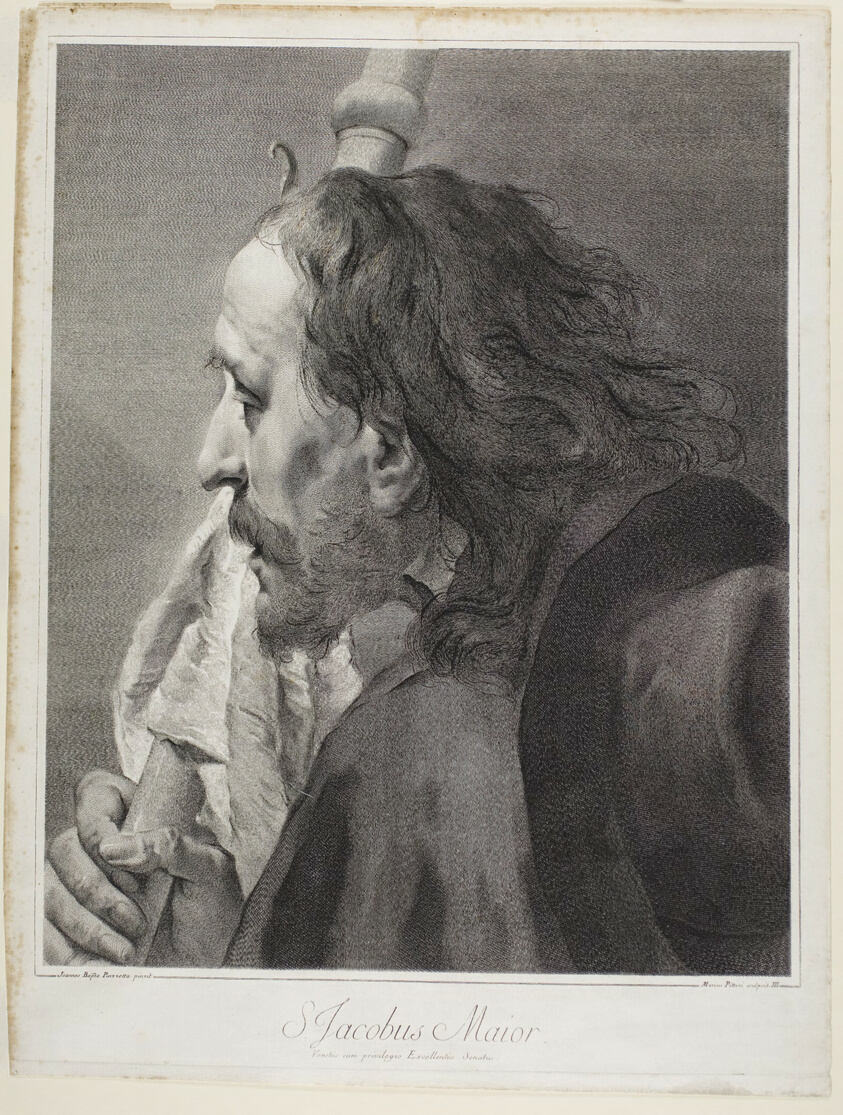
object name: Print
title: Saint Jacobus the Great, from The Holy Family and the Twelve Apostles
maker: Giovanni Marco Pitteri (Italian, 1702-1786); after Giovanni Battista Piazzetta (Italian, 1682-1754)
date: 1742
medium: Engraving in black on paper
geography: Italy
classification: engraving; print; prints and drawing